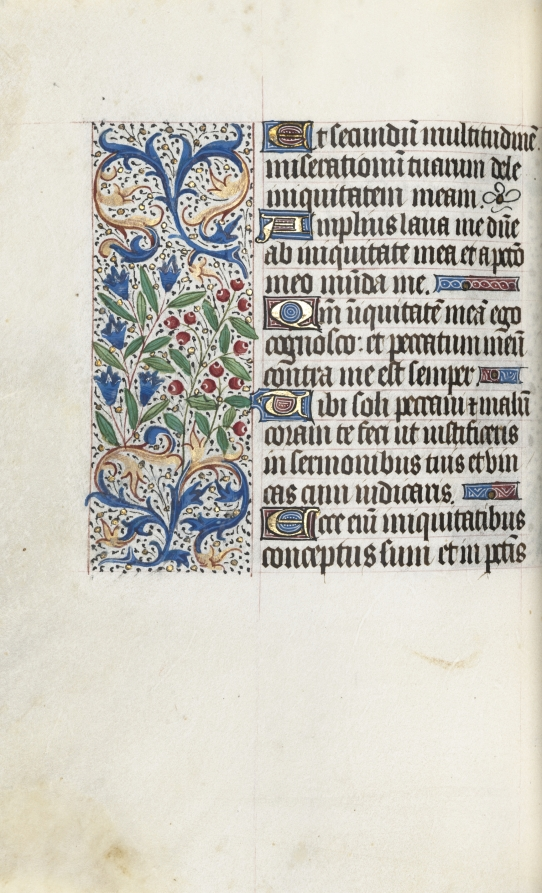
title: Book of Hours (Use of Rouen): fol. 85v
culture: France, Rouen, 15th century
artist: Master of the Geneva Latini (French, active Rouen, 1460–80)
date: c. 1470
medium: ink, tempera, and gold on vellum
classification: Bound Volume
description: In the late 1400s and early 1500s Rouen was an established and important center of book production. The city’s cathedral had a wealthy chapter that spent large sums of money to commission books and to maintain its extensive library. The stationers and booksellers would have likely been concentrated in or near the cathedral precinct. This artist, named after a manuscript now in Geneva, was Rouen’s principal illuminator during the second half of the 1400s.